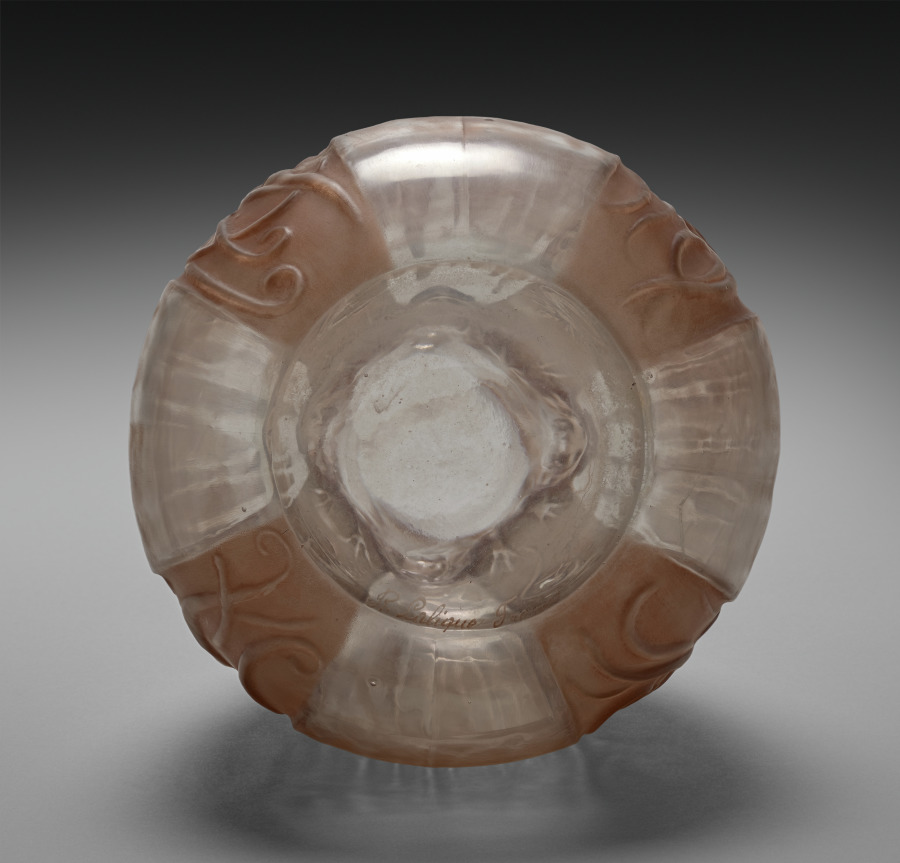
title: Mermaids and Frogs Decanter (Carafe sirènes et grenouilles)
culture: France, 20th century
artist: René Lalique (French, 1860–1945)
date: 1917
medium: glass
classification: Glass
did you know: The title of this work translates to mermaids and frogs carafe.